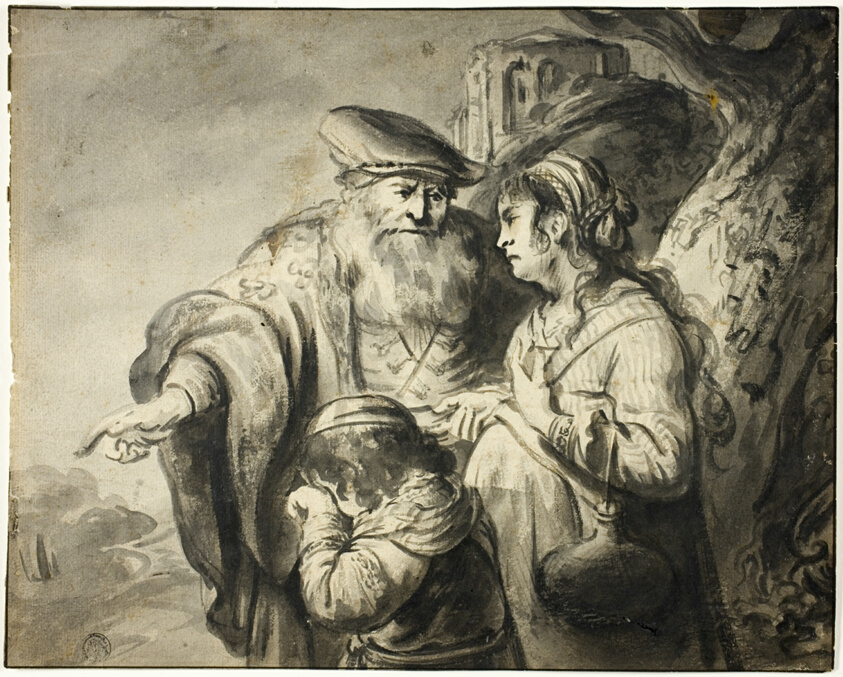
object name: Drawing and Watercolor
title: Expulsion of Hagar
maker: After Govaert Flinck (Dutch, 1615-1660); or Gerbrand van den Eeckhout, (Dutch, 1621-1674); or Leonard Bramer (Dutch, 1596-1674)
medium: Brush and black wash, over black chalk, on ivory laid paper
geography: Holland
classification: ink or chalk wash; drawings (visual works); prints and drawing